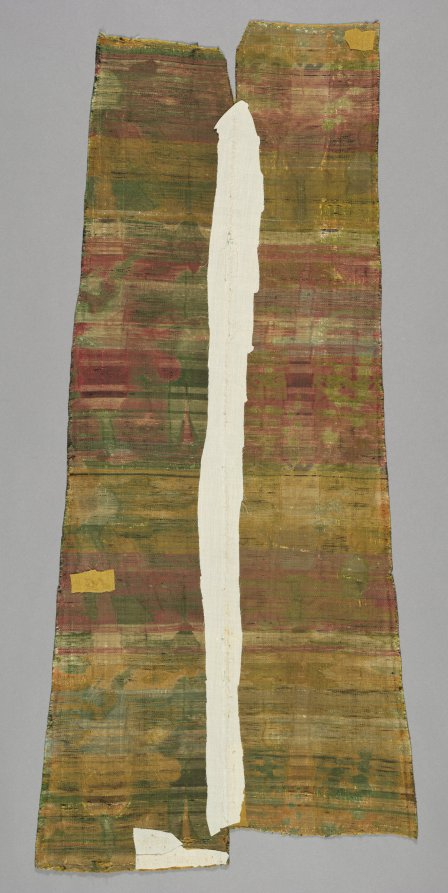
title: Wine bearers in landscape, from a robe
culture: Iran, Safavid period (1501–1722)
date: 1525–50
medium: Silk: lampas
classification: Textile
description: Iran is renowned for representations of large human figures in luxury silks during the Safavid period. Symbolic images of beauty and love characterize this signature silk in which a wine bearer appears in a landscape with cypresses and blossoming prunus trees, a pond, and a rocky hill along with animals of royal hunts. Cypresses and long-neck bottles were metaphors for elegance and male beauty while cypresses entwined by blossoming trees, paired pheasants, youth, and wine impart themes of love. The asymmetrical composition contrasts vitality and order, which contributes to concealing the repeated design inherent in patterned silks.